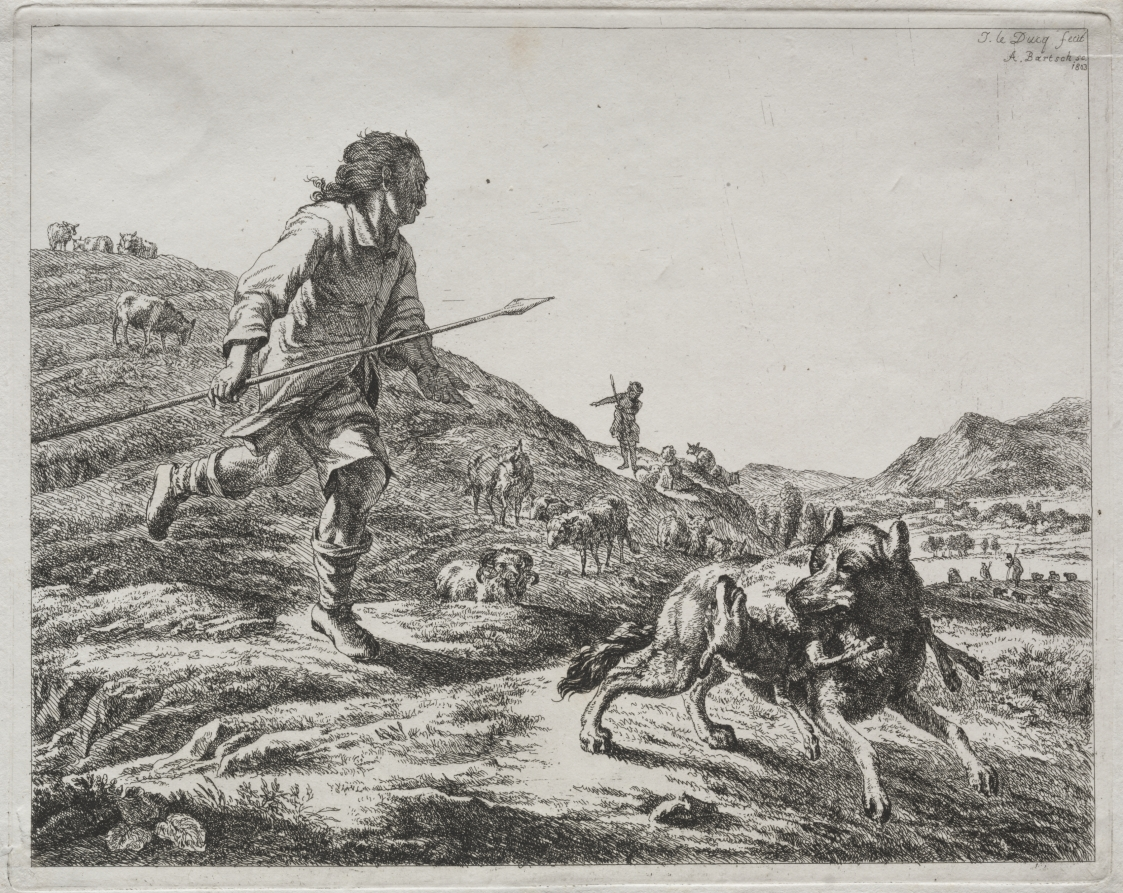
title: Shepherd Chasing a Wolf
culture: Austria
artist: Adam von Bartsch (Austrian, 1757–1821)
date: 1803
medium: etching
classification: Print